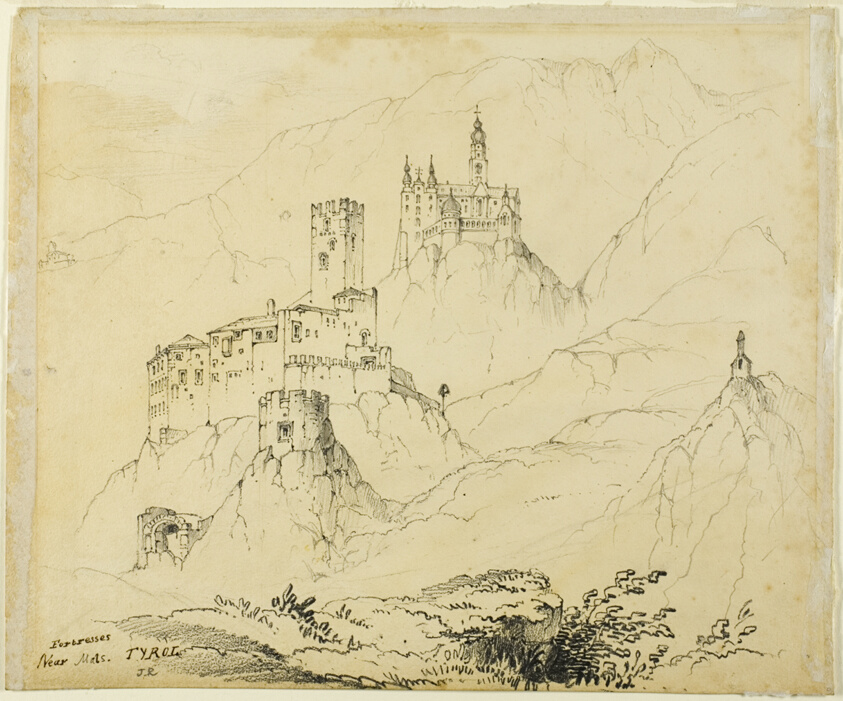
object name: Drawing and Watercolor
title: Fortresses in Tyrol, near Mals (recto); Castle in Lenzburg (verso)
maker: John Ruskin (English, 1819-1900)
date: 1839/1900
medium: Graphite (recto and verso) on buff wove paper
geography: England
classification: drawings (visual works); prints and drawing